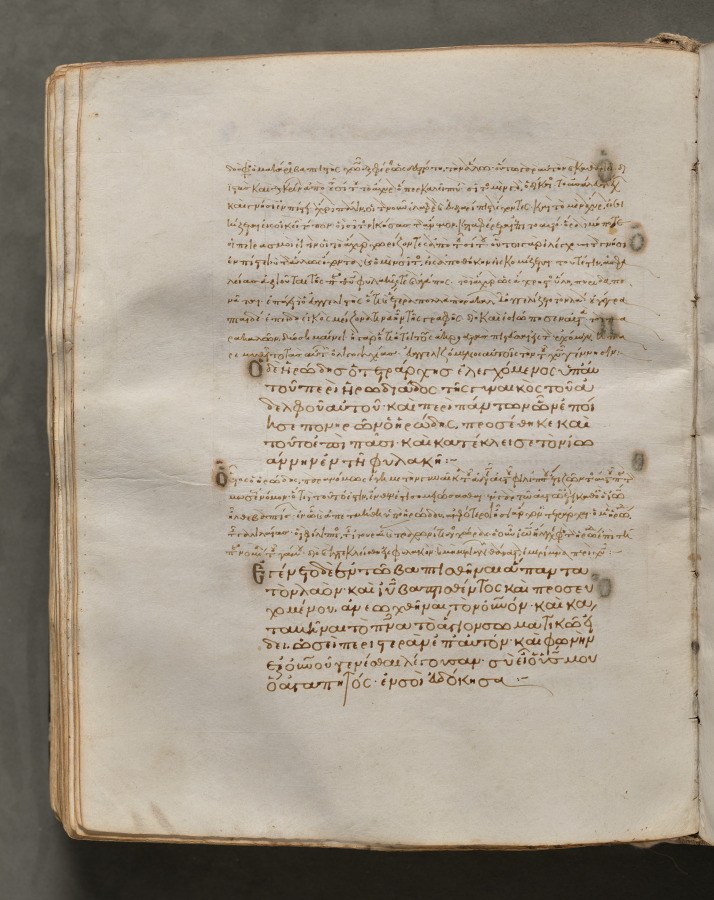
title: Text, folio 215 (verso), from a Gospel Book with Commentaries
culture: Byzantium, Constantinople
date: c. 1000–1100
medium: ink, tempera, and gold on vellum; leather binding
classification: Bound Volume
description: Each of the four gospels in this book opens on a page with brilliantly illuminated borders depicting the author of the text as well as birds-principally peacocks, symbols of the immortality of the soul-and fountains, representing the fountain of life and the salvation of the soul. This volume consists of 428 leaves with texts in Greek. Its level of sophistication suggests that it was probably written and decorated in a monastery in Constantinople.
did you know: Gospel Books were carried in procession through Byzantine churches.